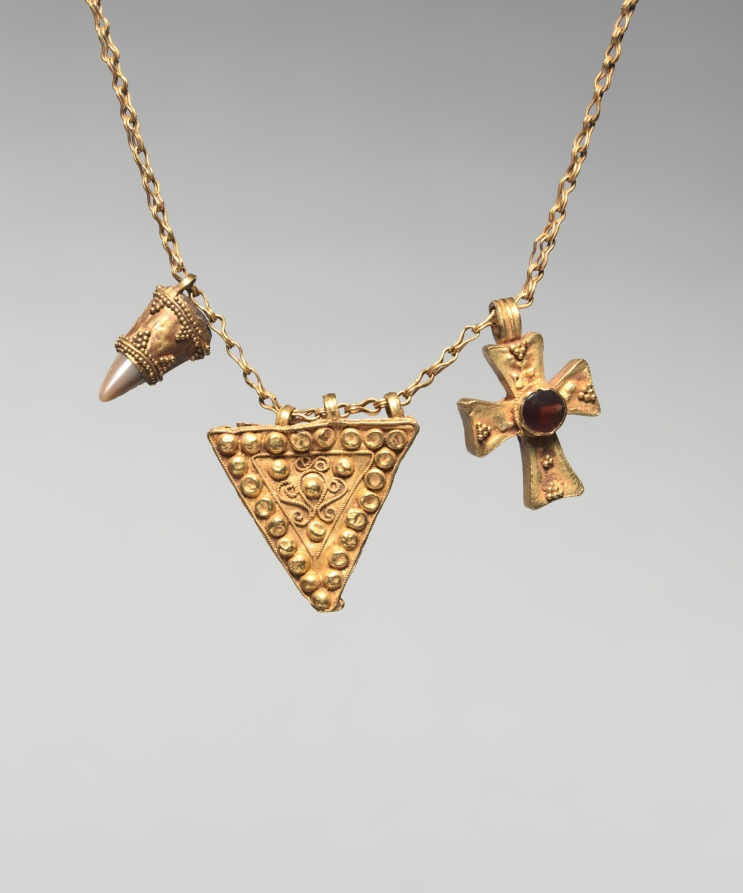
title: Chain with Two Pendants and a Cross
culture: Byzantium, early Byzantine period, 6th century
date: 500s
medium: gold with granulation and a garnet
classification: Jewelry